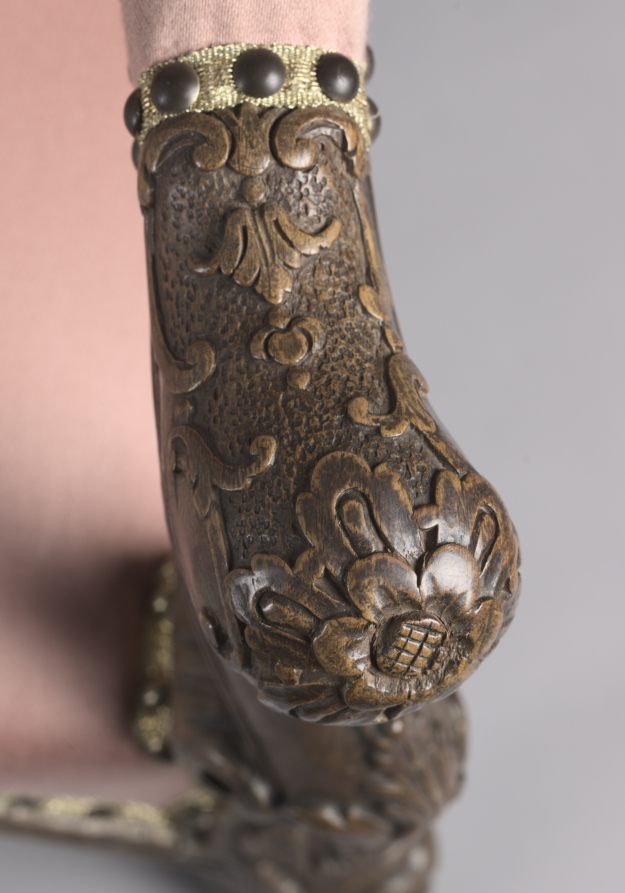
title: Armchair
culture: France, 18th century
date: c. 1715–1723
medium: oak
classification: Furniture and woodwork